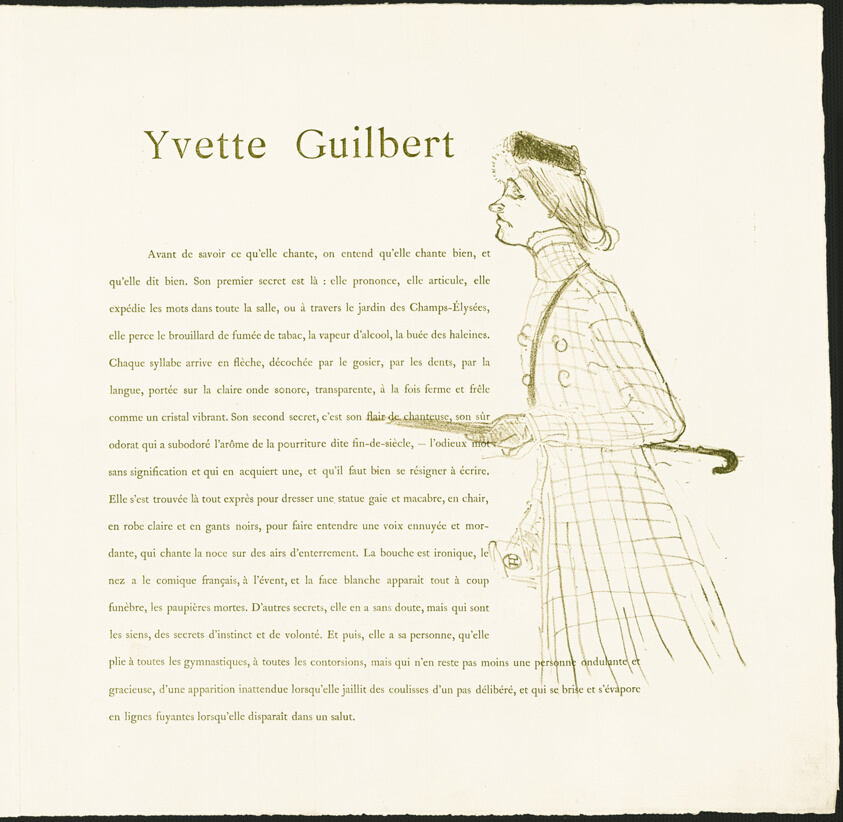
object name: Print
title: Yvette Guilbert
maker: Henri de Toulouse-Lautrec (French, 1864-1901)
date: 1894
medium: Lithograph with letterpress, on ivory laid paper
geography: France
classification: lithograph; print; prints and drawing